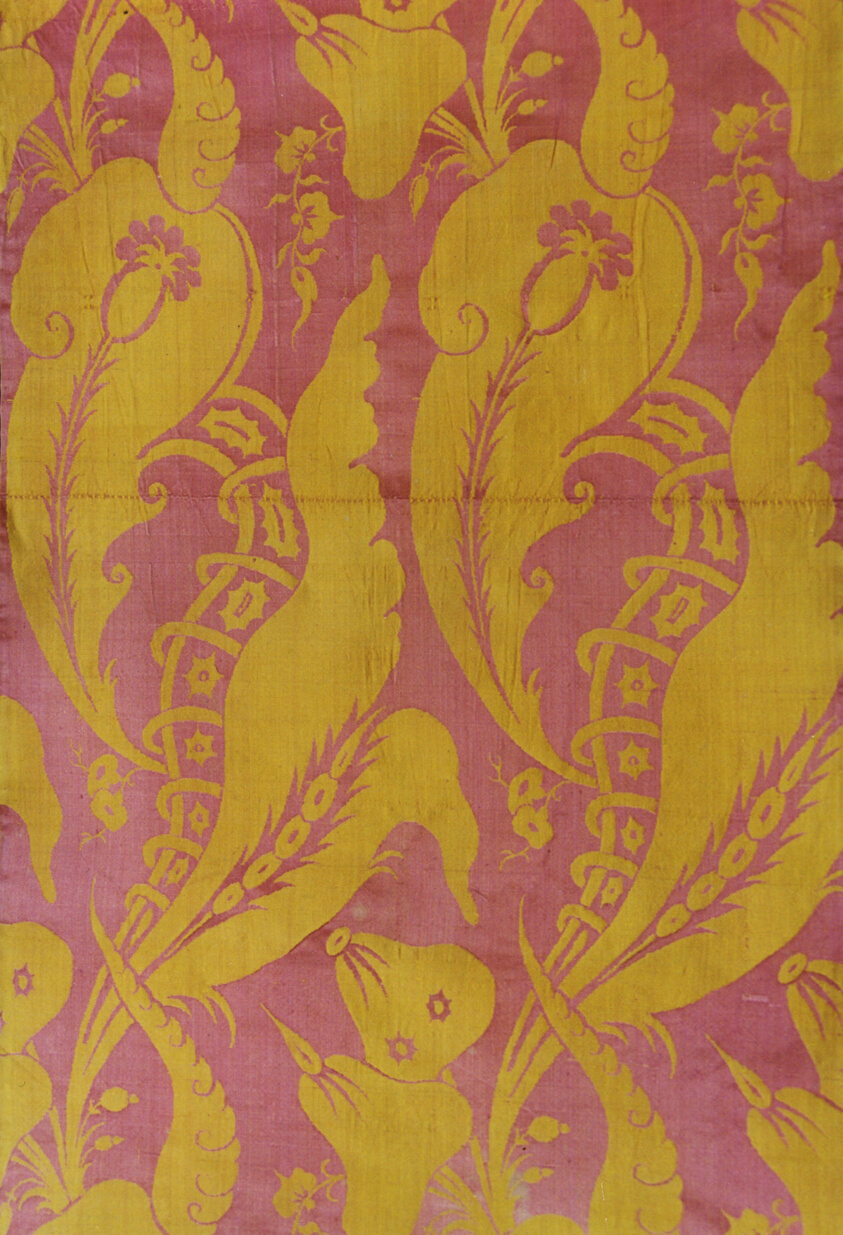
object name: Textile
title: Panel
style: "bizarre" style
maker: England, Spitalfields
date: 1706/09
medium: Silk, 4:1 damask weave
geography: England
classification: textile; weaving